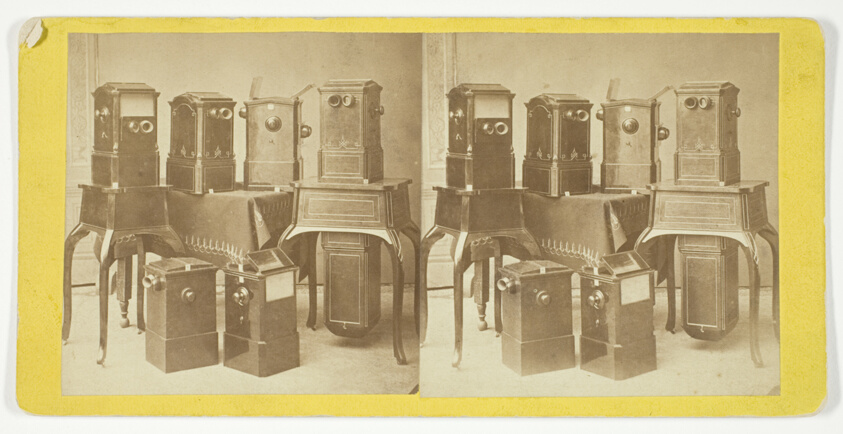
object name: Photograph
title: Beekers' Revolving Stereoscopes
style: 19th century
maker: Artist unknown; American, late 19th century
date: 1875/99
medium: Albumen print, stereo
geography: United States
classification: photography; photograph